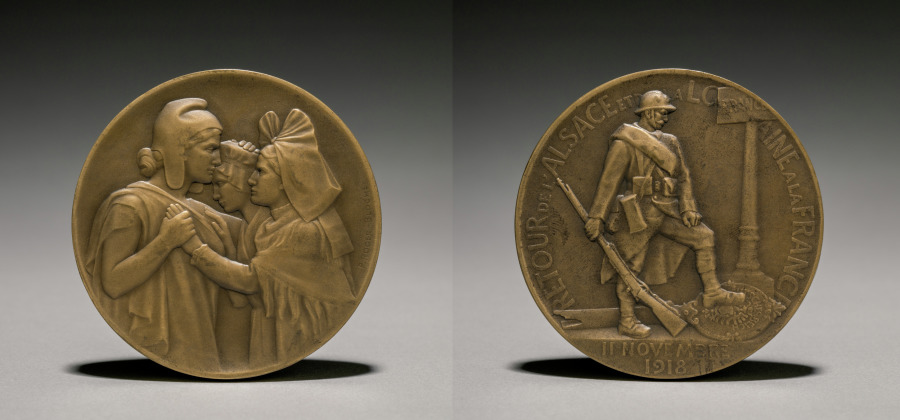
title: Medal (obverse)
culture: France, 20th century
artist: Paul Roger-Bloche (French)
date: 1900s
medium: bronze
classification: Metalwork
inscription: obverse - "Retour del 'Alsace et de la Lorraine à la France. 11 Novembre 1918."